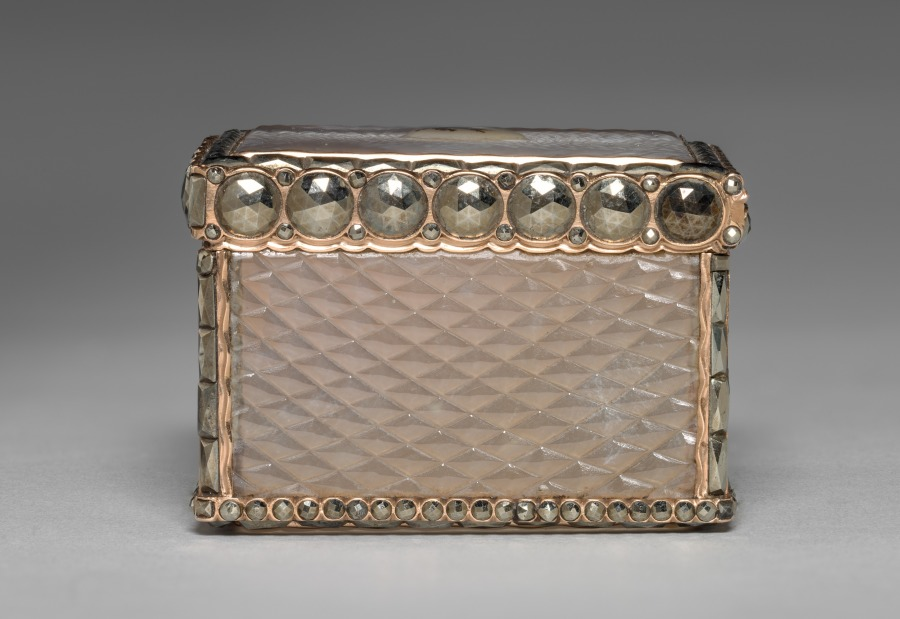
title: Snuff Box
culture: England, London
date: c. 1750–60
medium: gold-mounted agate, engine-turned panels, hematites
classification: Miscellaneous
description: Luxurious personal objects, like this snuff box, were an essential part of a privileged wardrobe during the 1700s and early 1800s, emphasizing their owner’s refinement and wealth. Their glittering surfaces, however, disguised a system based on the labor and suffering of enslaved or indentured people, whether in gold or gemstone mines, tobacco farms, or shops where these goods were made. Like cotton, sugar, and tea, snuff came from British colonies in America, India, and the Caribbean, where enslaved people were exploited to grow these crops under extremely harsh conditions.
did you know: This small, elaborate box held snuff, a form of powdered tobacco that was inhaled in tiny amounts.